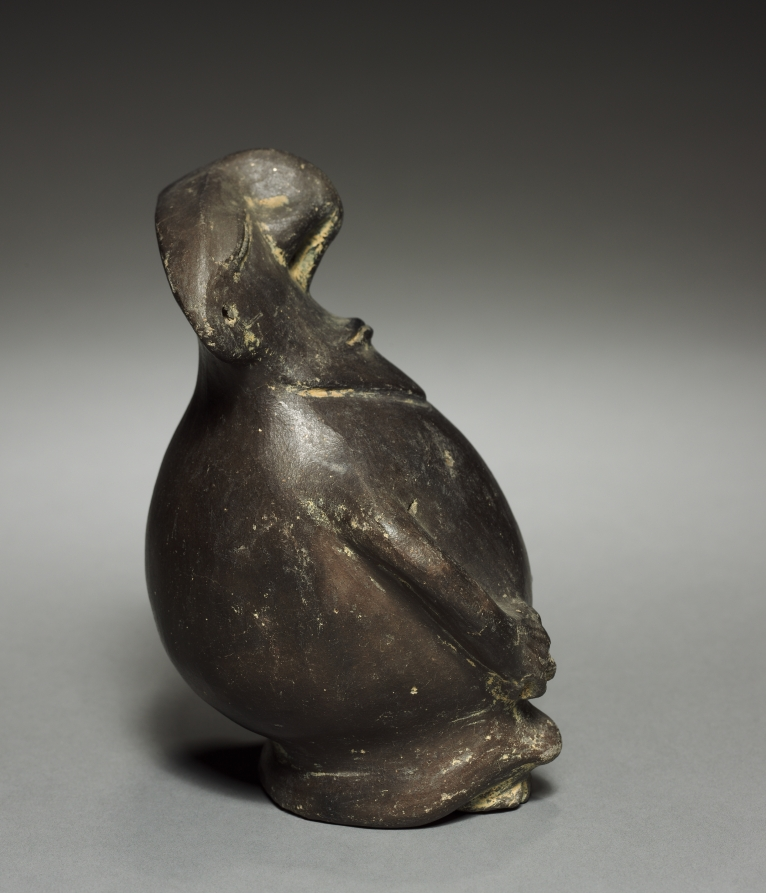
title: Figurine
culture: Colombia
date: before 1921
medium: pottery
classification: Ceramic